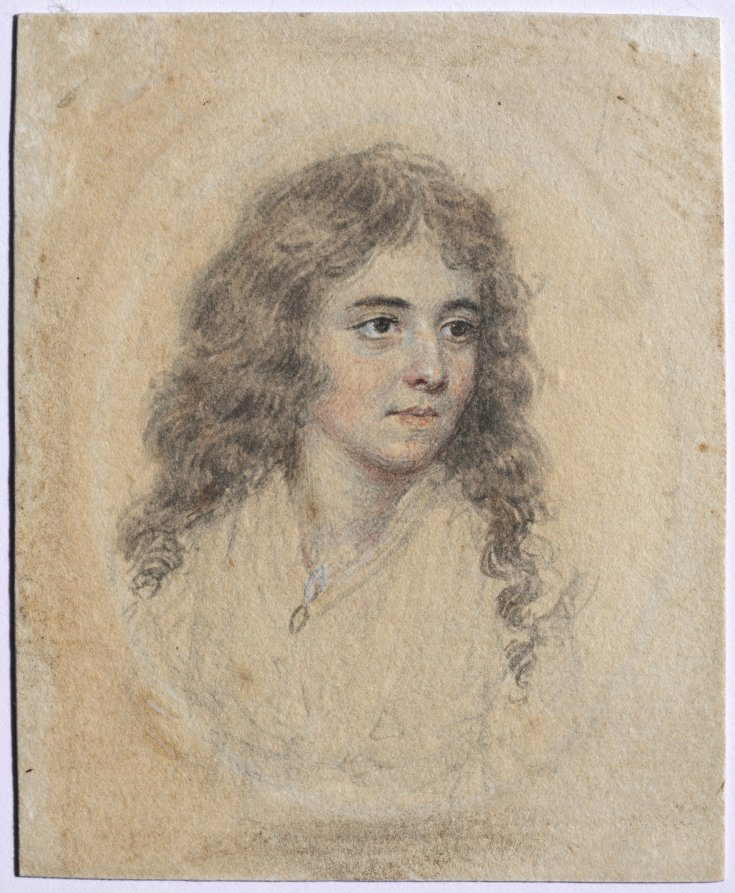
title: Portrait of Anna Maria Woolf, née Smart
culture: England, 18th century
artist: John I Smart (British, 1741–1811)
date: c. 1785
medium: graphite and wash on laid paper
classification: Portrait Miniature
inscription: Signature: none; inscribed on front of paper at upper right corner: 1[?][?]; inscribed on paper backing, in graphite at left center: Indi; upside down, at left above center: 38; inscribed in brown ink at center, on back of drawing: Mrs Peirce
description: Although it is impossible to say whether or not it was always part of the artist’s process to execute a preparatory sketch prior to painting each miniature, we do know that John Smart retained many hundreds of these sketches. A group of preparatory sketches—of which this portrait is one—descended through the Smirke family after Smart’s daughter Sarah gave a sketchbook containing preparatory portrait studies to her friend Mary Smirke, sister of the celebrated Victorian architect Sydney Smirke. This book was probably broken up around 1877 when it was divided between Sydney’s daughters Mary Jemmett and Mrs. Lange, whose portions were both sold at auction in 1928. This portrait was assigned the historically colorful but fictitious title of “Duchess Christina” at some point after memory of its true identity had been lost. Giving illustrious titles to portraits of unknown sitters was a popular strategy adopted by dealers during the nineteenth and twentieth centuries, often applied to miniature portraits and, in particular, to Smart’s sketches of women. Here, the sitter’s head is turned slightly to her left. She has dark brown eyes, rosy cheeks, and long, wavy dark hair falling below her shoulders. She wears a white dress with long sleeves and a ruffled bodice, and a small lozenge-shaped pendant around her neck. She is placed inside a faintly suggested oval, and the background is unpainted. The paper backing—removed in 1993—was inscribed with “38” and “Indi,” which may suggest that the sketch was executed during Smart’s time in India. The inscription that was discovered on the back of the drawing after the paper backing was removed reads, “Mrs [or perhaps Miss] Peirce.” Although the inscription appears to be in the artist’s hand, and in the brown ink he used to annotate his preparatory sketches, its relationship to this portrait is unclear. The sitter is probably Anna Maria, Smart’s eldest daughter by his first wife, whose name is unknown. Anna Maria (1766–1813) traveled with her father to India in 1785, sailing from England on April 19 and arriving in Madras on September 6. If the work was executed in India at the time Anna Maria accompanied her father there, the sketch may be dated to around 1785, the year they moved to the subcontinent. Anna Maria would have been around 18 years old. The fact that this portrait is of an older girl who dons a plain, modest dress and wears her hair down suggests an intimacy not found in the type of portraits Smart commonly executed of women wearing fine gowns and elaborately dressed hair.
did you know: After living in India for many years, Anna Maria was en route to England when she was forced to disembark at St. Helena to give birth to her son.